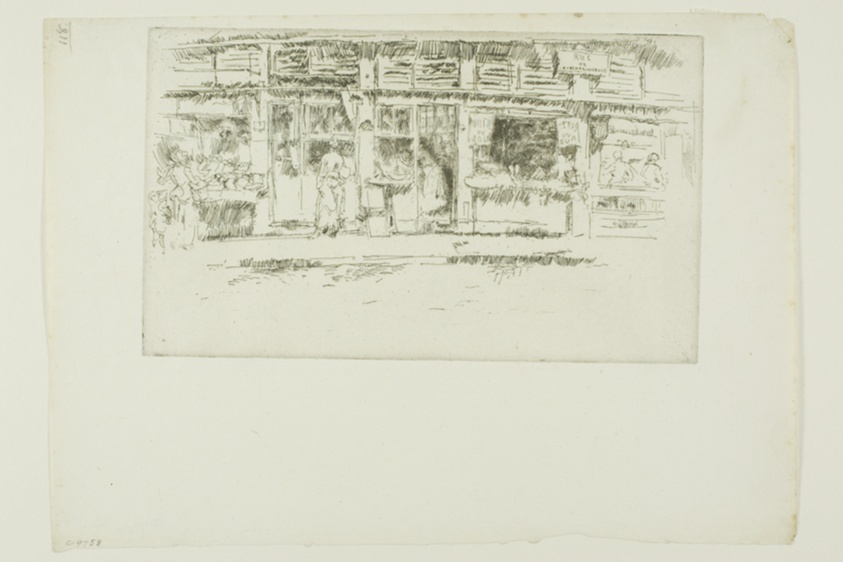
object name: Print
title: Rue de la Rochefoucault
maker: James McNeill Whistler (American, 1834-1903)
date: 1888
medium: Etching and drypoint with foul biting in black ink on ivory laid paper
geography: United States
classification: etching; foul biting; print; prints and drawing; paper; drypoint